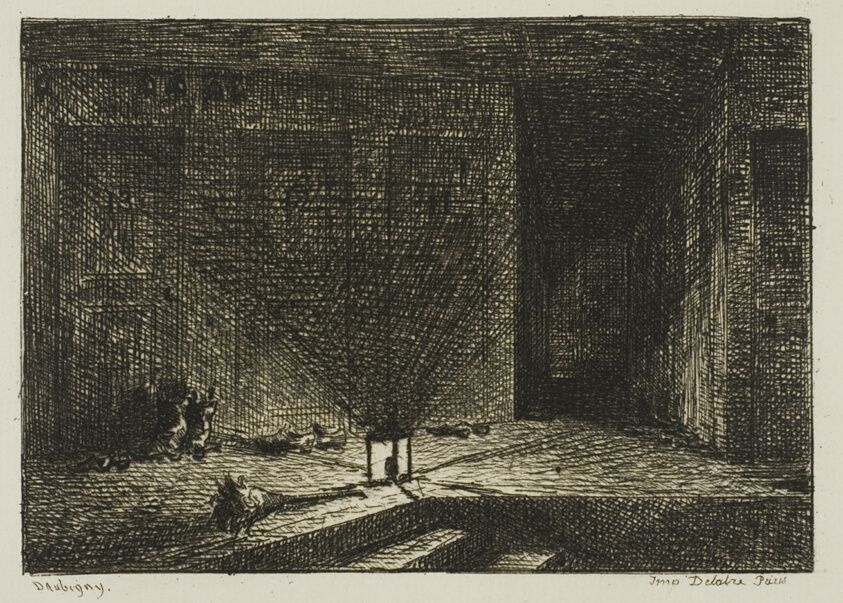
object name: Print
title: Interior of an Inn (The Corridor of an Inn)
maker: Charles François Daubigny (French, 1817-1878)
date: 1861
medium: Etching on ivory laid paper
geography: France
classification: etching; print; prints and drawing